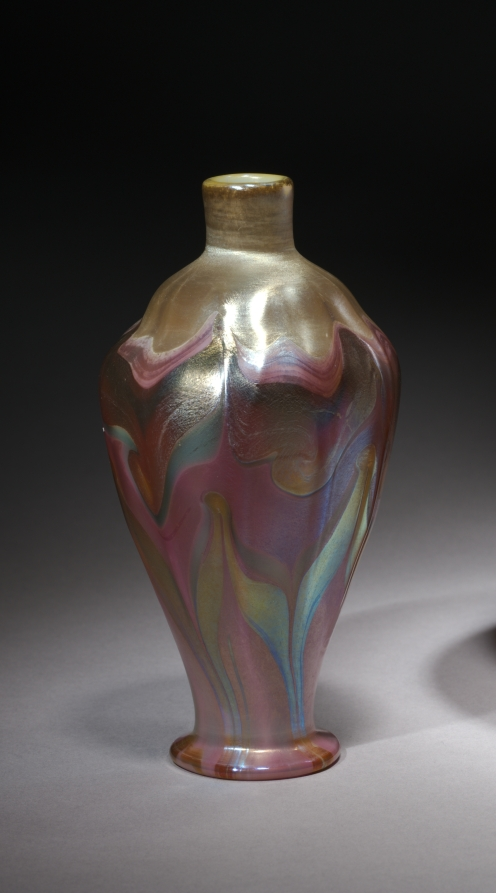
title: Vase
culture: America, New York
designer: Louis Comfort Tiffany (American, 1848–1933)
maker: Tiffany Studios (United States, New York, 1902–32)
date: c. 1905–10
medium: favrile glass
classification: Glass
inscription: inscribed on base: Louis C. Tiffany; L.C.T.; L301.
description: This small vase is made of Louis Comfort Tiffany's signature Favrile glass. Early on when Tiffany began collaborating with glass artists on new types of production, his aesthetic ambitions were realized in the development of Favrile glass, deliberately named to sound French, expensive, and “handmade.” Largely through Tiffany's marketing ability, Favrile glass became America’s greatest contribution to the Art Nouveau style. His works were exhibited at international expositions; galleries in major European cities, where his creations were bought by many museums; and in his store in Manhattan, known as the Tiffany Glass and Decorating Co., later Tiffany Studios. Along with the many shapes and sizes of his decorative vases, Tiffany used Favrile glass in mosaic panels, stained glass windows, and his artistic line of table and floor lamps.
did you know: Introducing various chemicals into the molten glass within the furnace produced multicolored iridescence on the surface when this vase was blown and cooled.